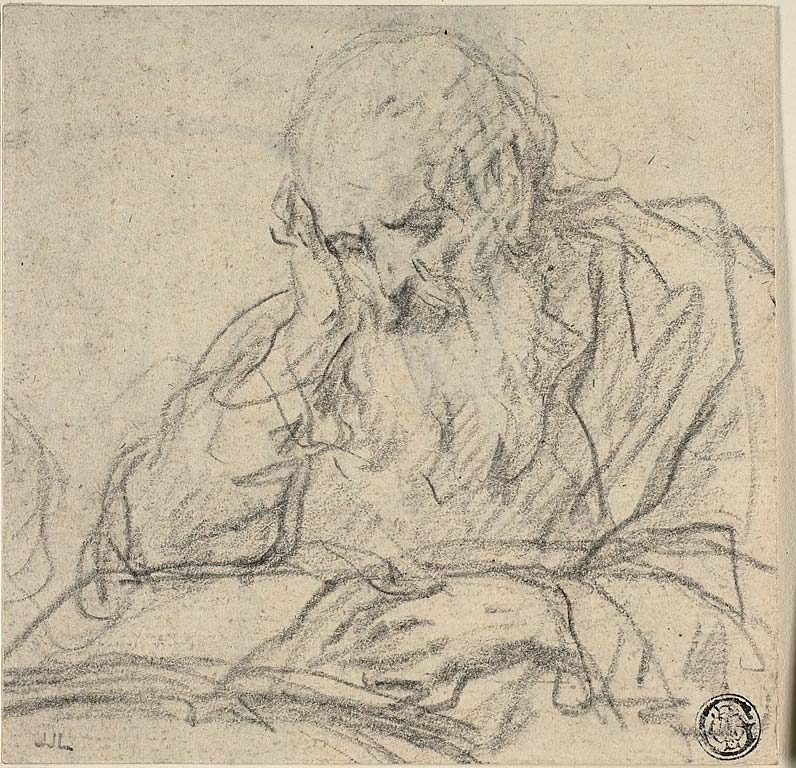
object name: Drawing and Watercolor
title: Saint Reading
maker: Attributed to Baldassare Franceschini, called Volterrano; Italian, 1611–1690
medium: Black chalk on cream laid paper, laid down on ivory wove paper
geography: Italy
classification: chalk; drawings (visual works); prints and drawing